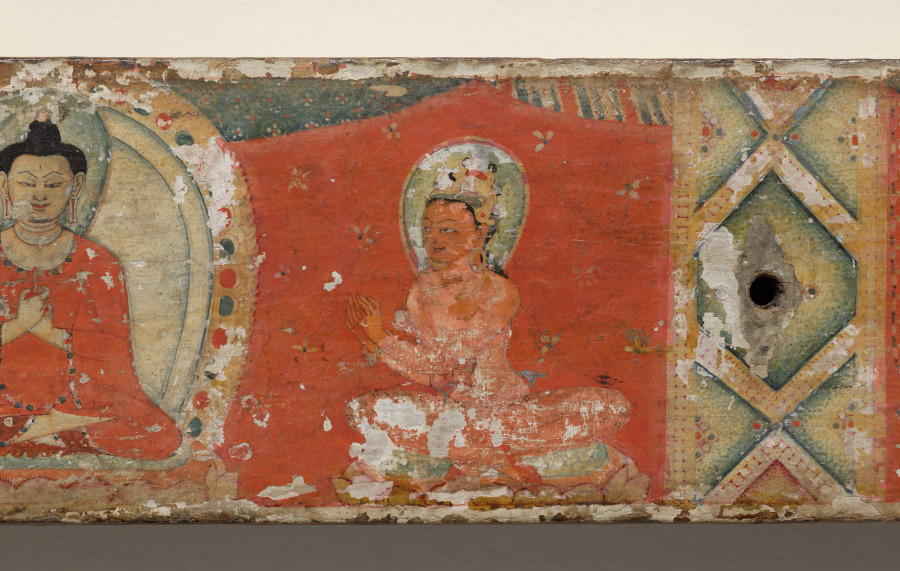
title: Ratnasambhava, Akshobhya, Vairochana with attendants, Amitabha, and Amoghasiddhi, Top cover, from a Manuscript of the Perfection of Wisdom in Eight Thousand Lines (Ashtasahasrika Prajnaparamita-sutra)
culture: Eastern India, Bihar, Vikramashila Monastery. Paintings: Nepal, Kathmandu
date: Sunday, September 14, 1119 (year 239 of the Newar Samvat in the month of Ashvina)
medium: Covers: Gum tempera, colors, and paper on wood; pages: gum tempera and ink on palm leaves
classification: Painting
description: The inner side of the top cover is fully painted with images of the Five Cosmic Buddhas of Esoteric Buddhism. Each one has a different color, meaningful hand gesture, and is associated with a spatial direction. In the center is the white Vairochana holding his hands in the enlightenment mudra. On either side of the binding holes are the other four Cosmic Buddhas Akshobyha (blue, earth-touching mudra, east) and Amitabha (red, meditation mudra, west), and on the ends are Ratnasambhava (gold, gift-giving mudra, south) and Amoghasiddhi (green, fear-not mudra, north). The top side is covered with ritual materials indicating that this book was once an object of worship.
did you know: The Five Tathagatas could be the source of visions that would help Buddhist practitioners on the path to enlightenment.